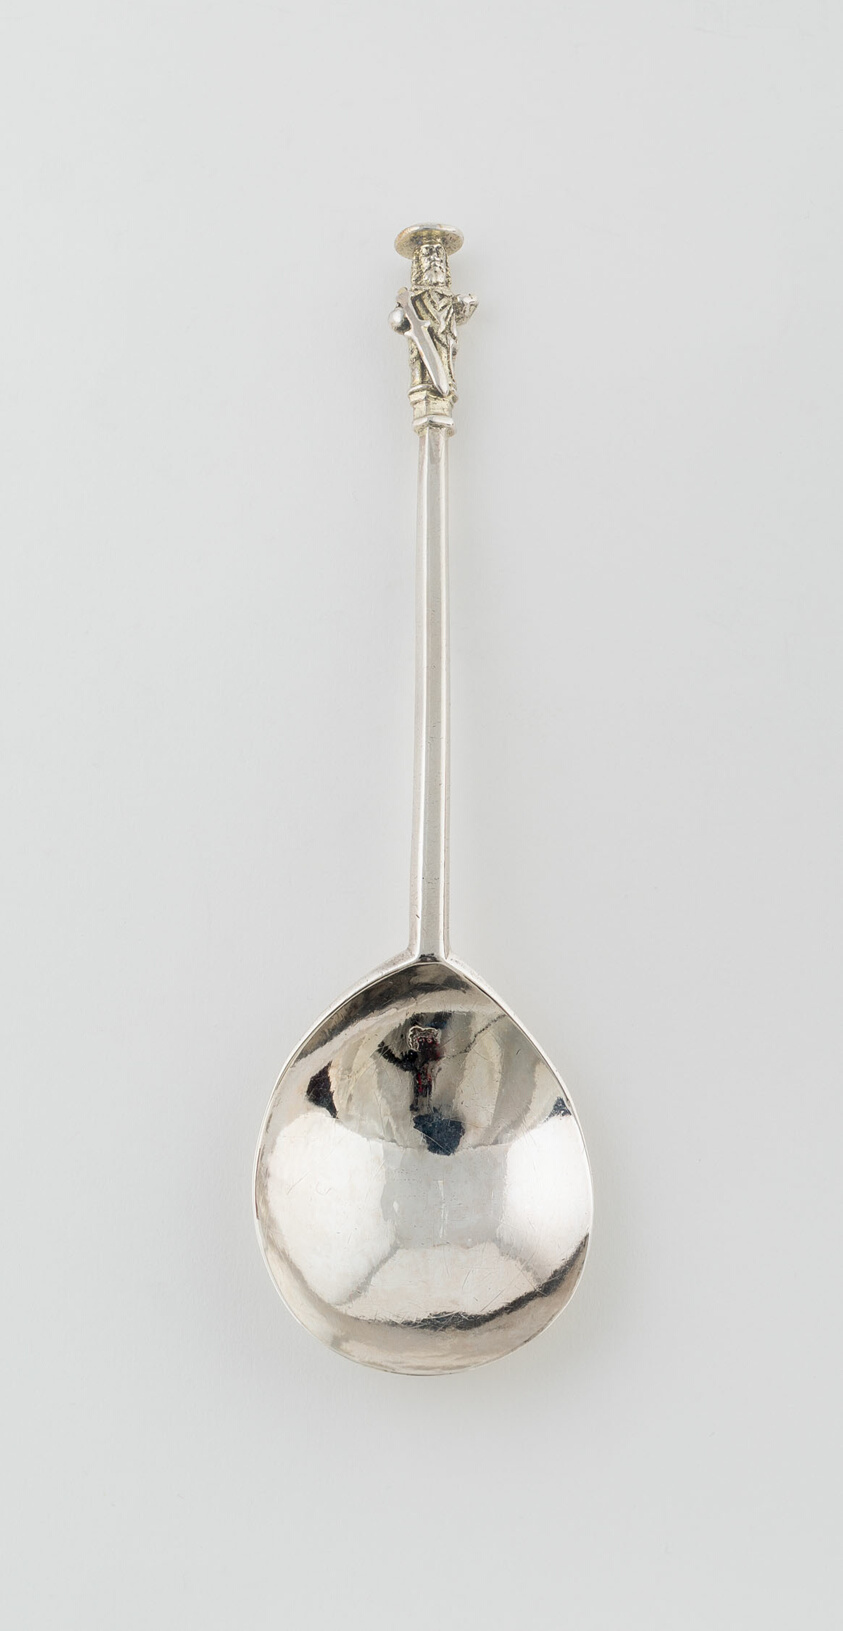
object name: Metalwork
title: Apostle Spoon: St. Bartholomew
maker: London, England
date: 1618/19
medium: Silver; figure gilded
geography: London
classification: silver; metalwork; european decorative arts